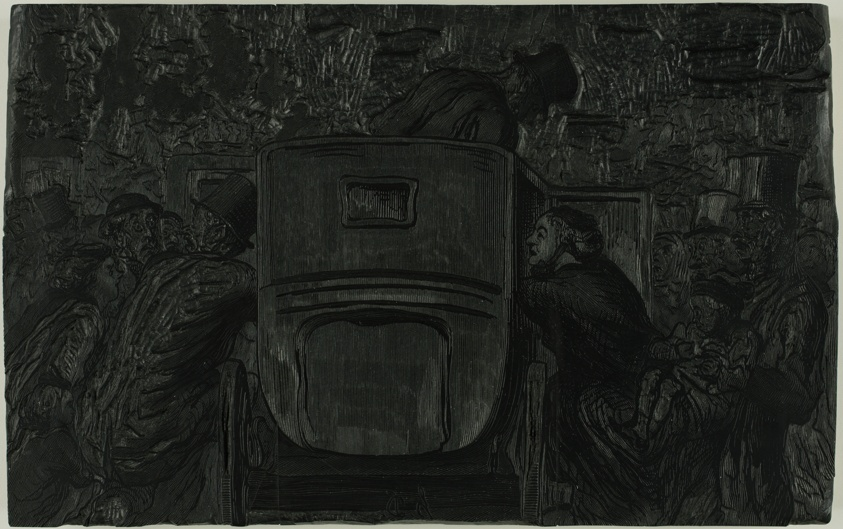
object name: Print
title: At the Universal Exhibition. The visitor will easily find any means of transportation to return to his hotel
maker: Julien Antoine Peulot (French, born 1827); after Honoré Victorin Daumier (French, 1808-1879); prints from the block later published in Le Monde illustré (French, founded 1856)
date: 1867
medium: Wood engraving block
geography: France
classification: wood engraving block; matrix; prints and drawing; print